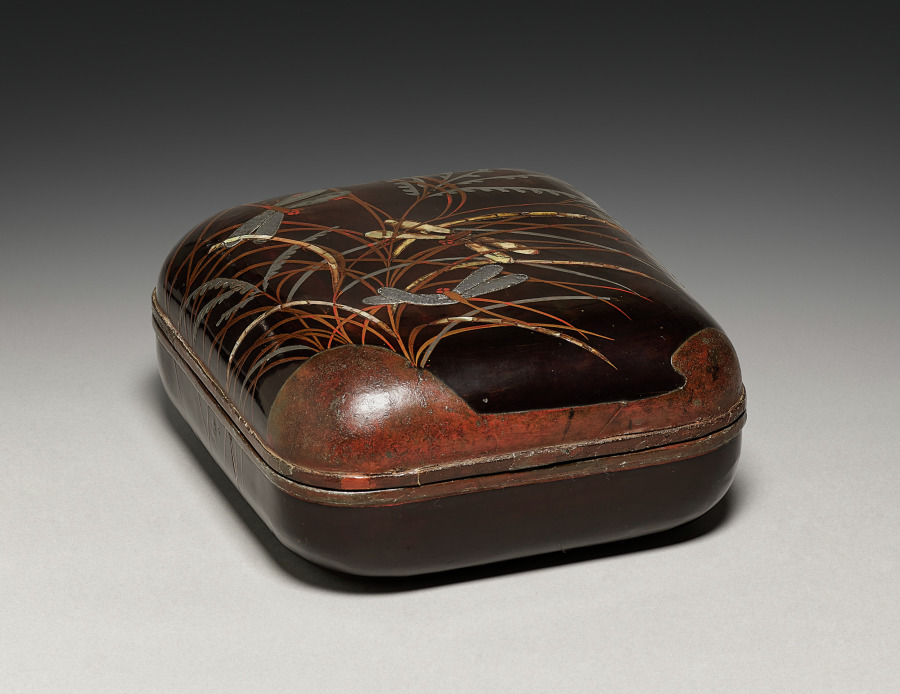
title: Letter Box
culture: Japan, Edo period (1615–1868)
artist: manner of Ogata Kōrin (Japanese, 1658–1716)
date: 1700s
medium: lacquer with pewter and mother-of-pearl inlay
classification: Lacquer